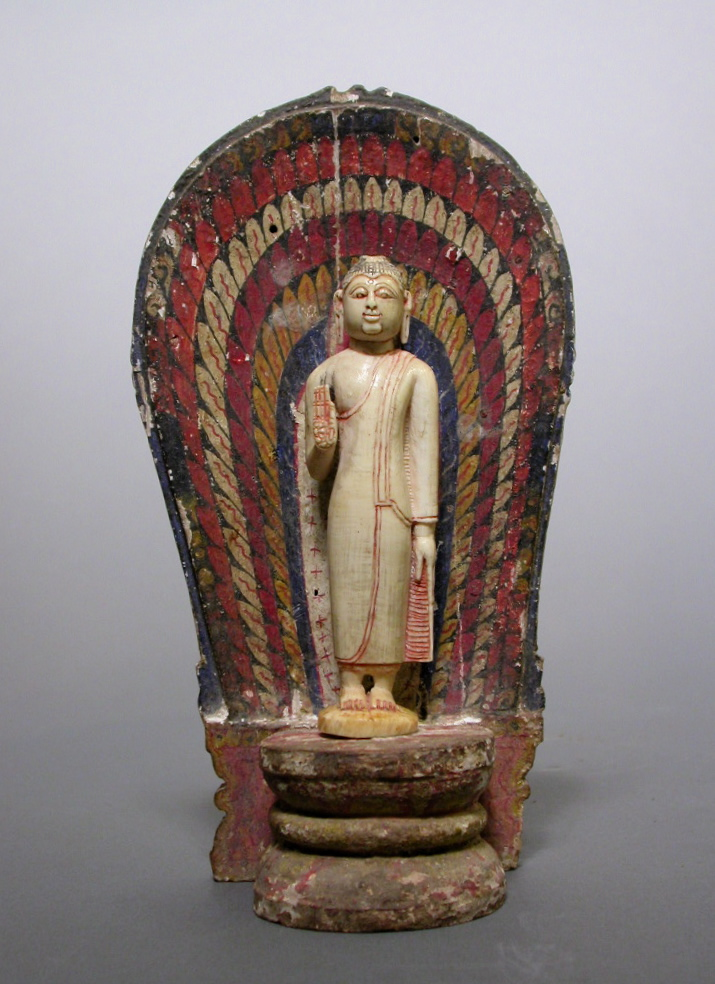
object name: Sculpture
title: Buddha Standing with Hand in the Gesture of Reassurance (Abhayamudra) with Radiating Nimbus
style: South Asian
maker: Sri Lanka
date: Kandyan period (1480–1815)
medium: Ivory, wood, and pigments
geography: Sri Lanka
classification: ivory; sculpture; asian art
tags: Buddha